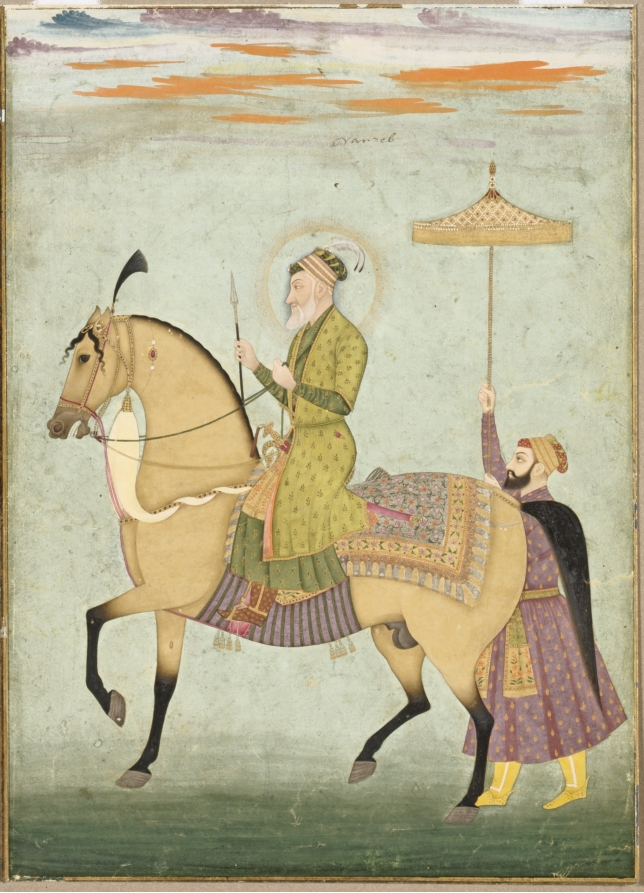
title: The Emperor Alamgir (reigned 1658–1707) on Horseback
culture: India, Mughal Dynasty (1526-1756)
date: c. 1690–1710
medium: Gum tempera, gold, and silver on paper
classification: Painting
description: The equestrian portrait genre was inspired by gifts of European prints and paintings to the Mughal court. The sixth Mughal emperor is portrayed on an elegant, decorated steed, ready for battle, holding a spear, and his sword at the ready. His attendant holds the symbolic parasol over him, which is a millennia-old emblem of kingship in India. Throughout his long reign he was primarily occupied with the conquest of the Deccan, which he ultimately achieved, expanding the Mughal Empire to its greatest geographical extent.